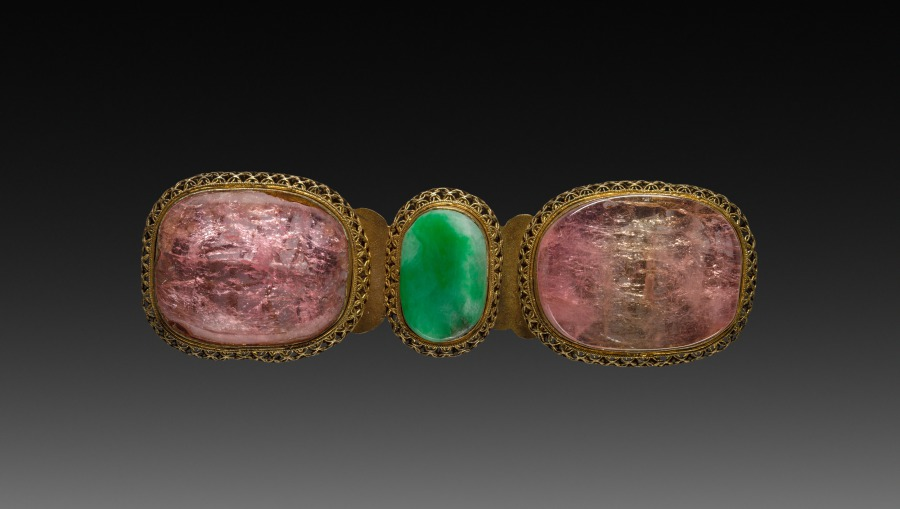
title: Buckle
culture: China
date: 1900s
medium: brass gilt wire work set with rose quartz and jade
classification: Jewelry